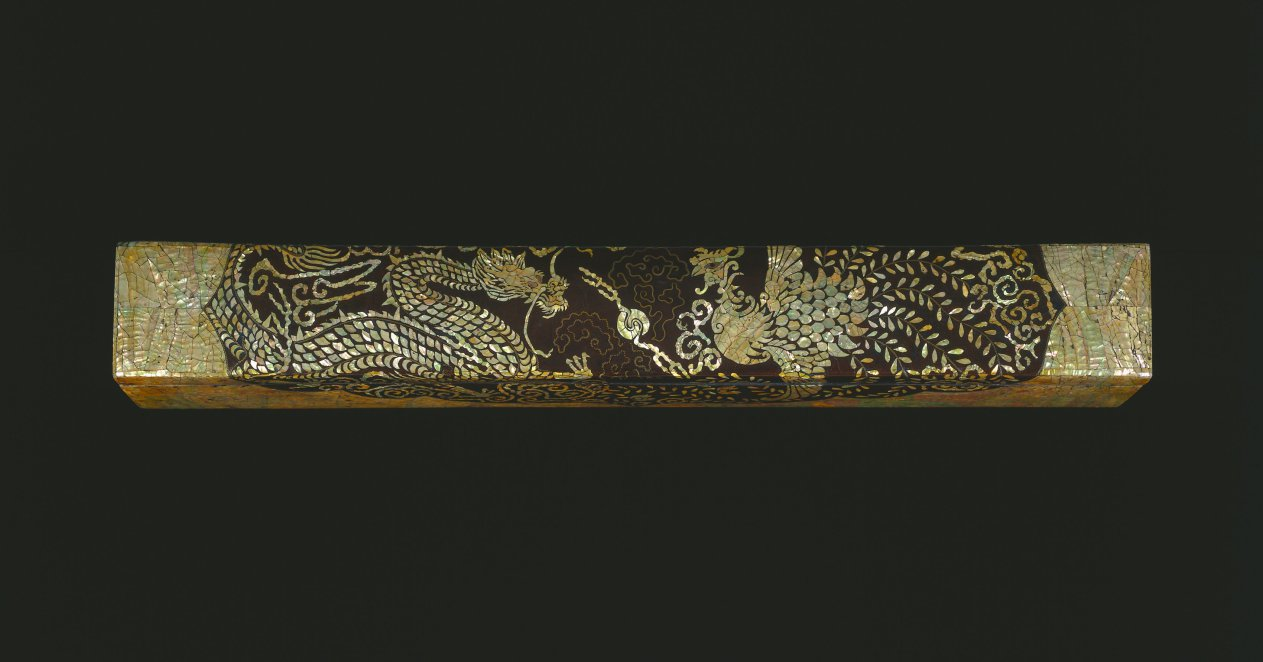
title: Scroll Box with Dragon and Phoenix Design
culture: Korea, Joseon dynasty (1392–1910)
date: 1800s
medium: lacquered wood inlaid with mother-of-pearl and twisted brass and copper wire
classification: Lacquer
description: This large rectangular box was designed for keeping a scroll or an important document. The mother-of-pearl inlaid lacquer rendering of a dragon and phoenix combines texture, color, and shape to produce a dazzling effect. The large and prominent designs of the Joseon-period inlaid lacquer, like on this box, replaced the fine detail and mosaic-like patterns popular in the Goryeo period (918-1392).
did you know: This technique of using the inlays of iridescent mother-of-pearl and abalone shells has been practiced in Korea for over a thousand years,